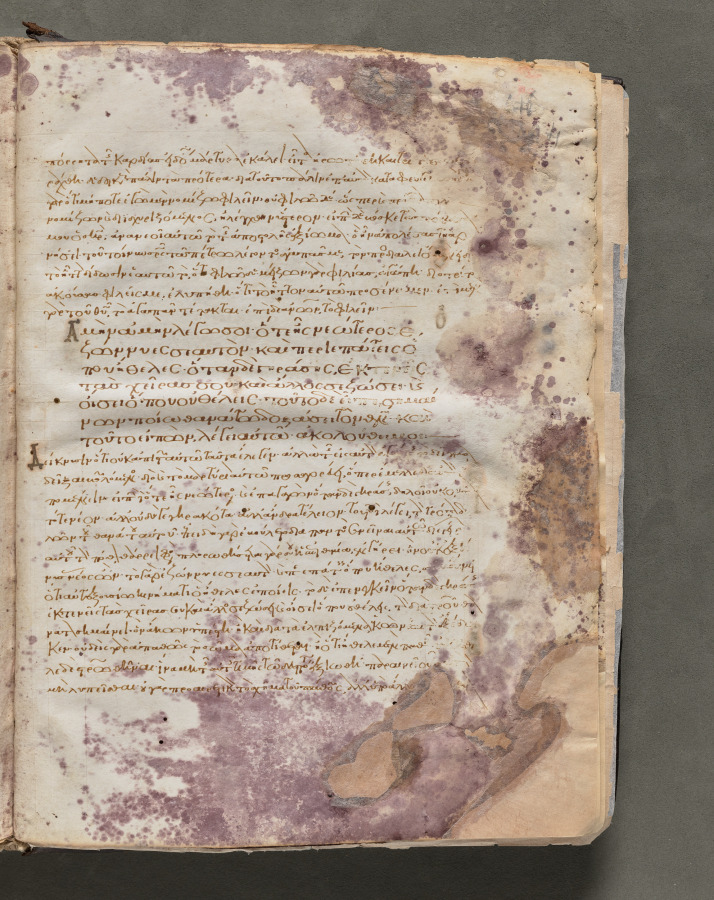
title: Text, folio 424 (recto), from a Gospel Book with Commentaries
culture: Byzantium, Constantinople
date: c. 1000–1100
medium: ink, tempera, and gold on vellum; leather binding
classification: Bound Volume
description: Each of the four gospels in this book opens on a page with brilliantly illuminated borders depicting the author of the text as well as birds—principally peacocks, symbols of the immortality of the soul—and fountains, representing the fountain of life and the salvation of the soul. This volume consists of 428 leaves with texts in Greek. Its level of sophistication suggests that it was probably written and decorated in a monastery in Constantinople.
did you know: Gospel books were carried in procession through Byzantine churches.